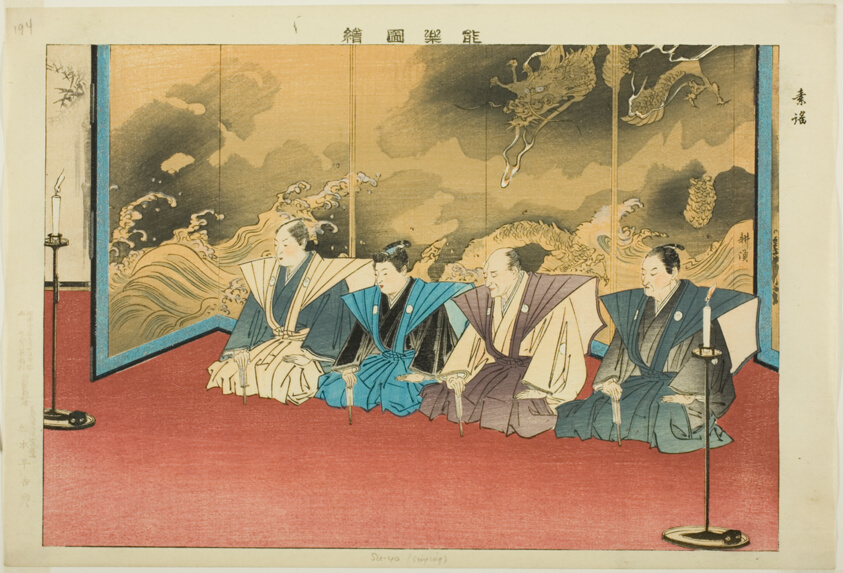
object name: Print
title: Su-yo or Suutai, from the series "Pictures of No Performances (Nogaku Zue)"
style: Japanese (culture or style)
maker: Tsukioka Kogyo; Japanese, 1869-1927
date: 1898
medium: Color woodblock print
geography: Japan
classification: woodblock print; print; asian art